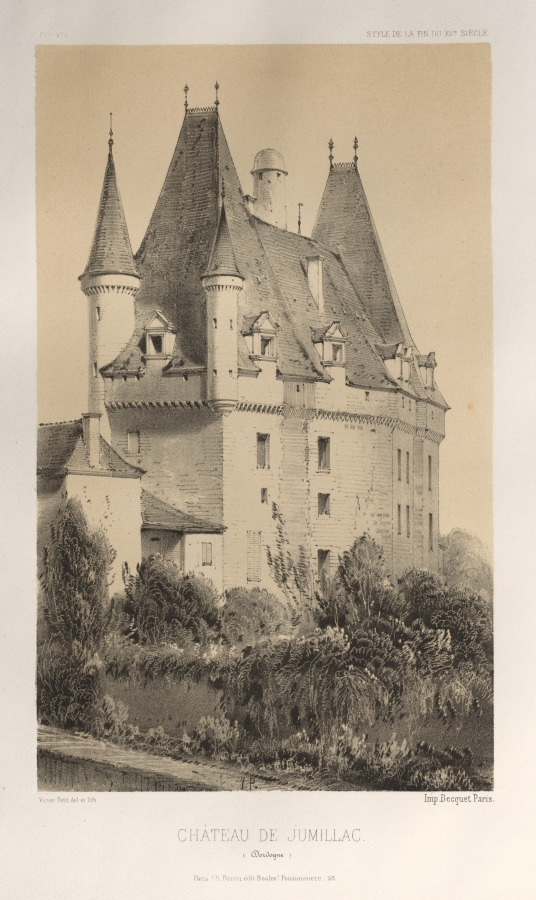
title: Architecture Pittoresque ou Monuments des XVeme. Et XVIeme. Siecles: Chateaux de France des XV et XVI Siecles: Pl. 51, Château De Jumillac (Dordogne)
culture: France, 19th century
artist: Victor Petit (French, 1817–1874)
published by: Charles Boivin (publisher and editor); Lith de Godard a Paris (printer)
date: 1860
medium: lithograph with tint stone, from portfolio of 100 lithographs with tint stone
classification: Print